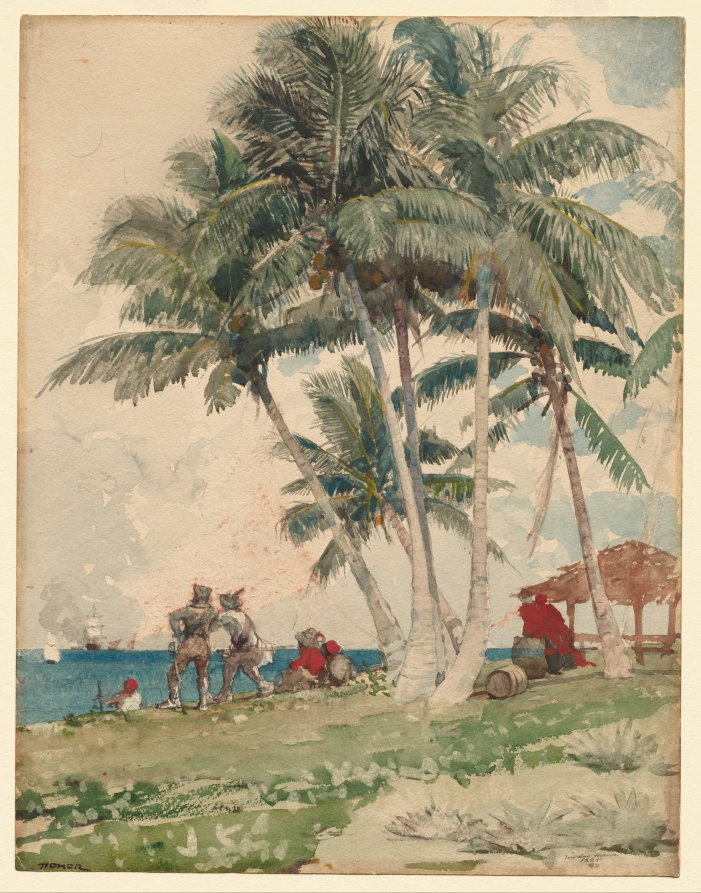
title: The Buccaneers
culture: America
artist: Winslow Homer (American, 1836–1910)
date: 1885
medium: watercolor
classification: Drawing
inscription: ll: Homer; lr: Winslow Homer / 1885